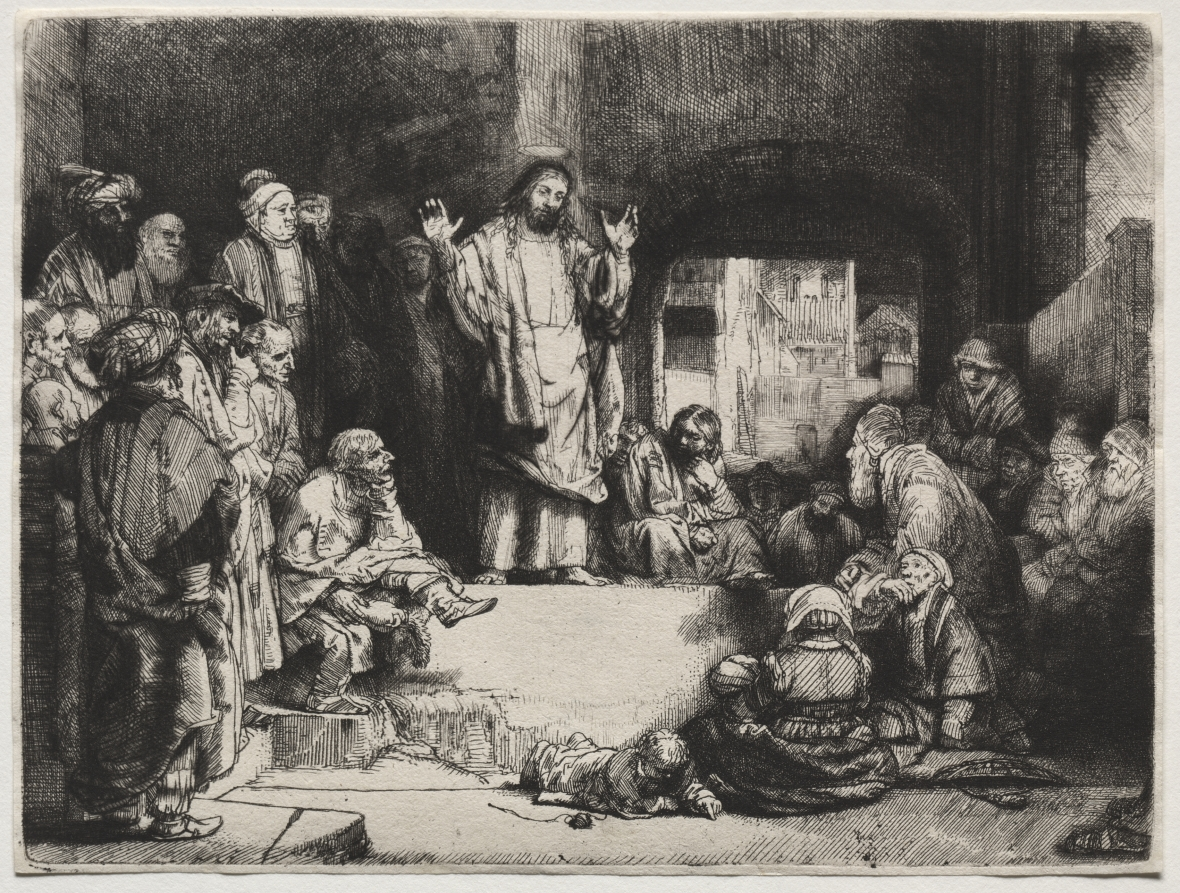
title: Christ Preaching ('La Petite Tombe')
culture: Netherlands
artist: Rembrandt van Rijn (Dutch, 1606–1669)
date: c. 1652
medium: etching, drypoint, and burin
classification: Print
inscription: VERSO, lower left, in pen and brown ink: R [scribble] 1749 ; lower center, in graphite: + 15[sideways]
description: Rembrandt’s prints with biblical subject matter often focus on Christ’s relationships with ordinary people. Here, he depicted Christ preaching in a humble village, with onlookers ranging from distracted children to turbaned merchants. Rembrandt worked more prolifically in etching than any artist before him, using it for about 300 prints. This work demonstrates the draftsman-like, sketchy technique he brought to the medium. In this impression, he allowed ink to remain on the plate’s surface during printing to create the dramatic shadows in the background, producing a contrast to the spiritual glow of light emanating from Christ.